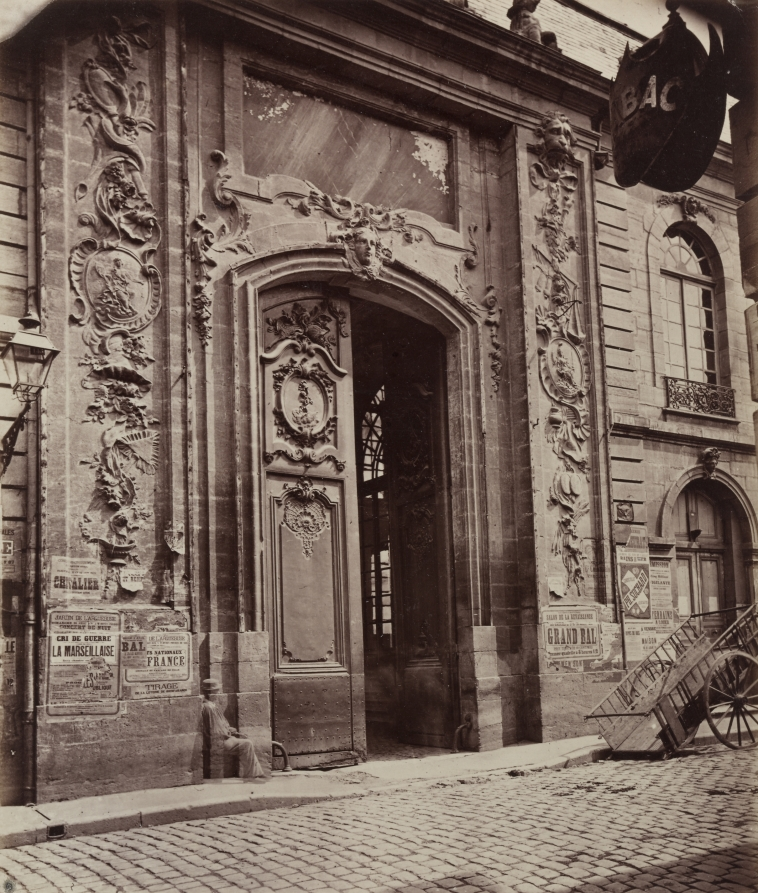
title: Street in Dijon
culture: France, 19th century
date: before 1870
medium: albumen print from wet collodion negative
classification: Photograph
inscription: Written in pencil on verso: "Dijon"